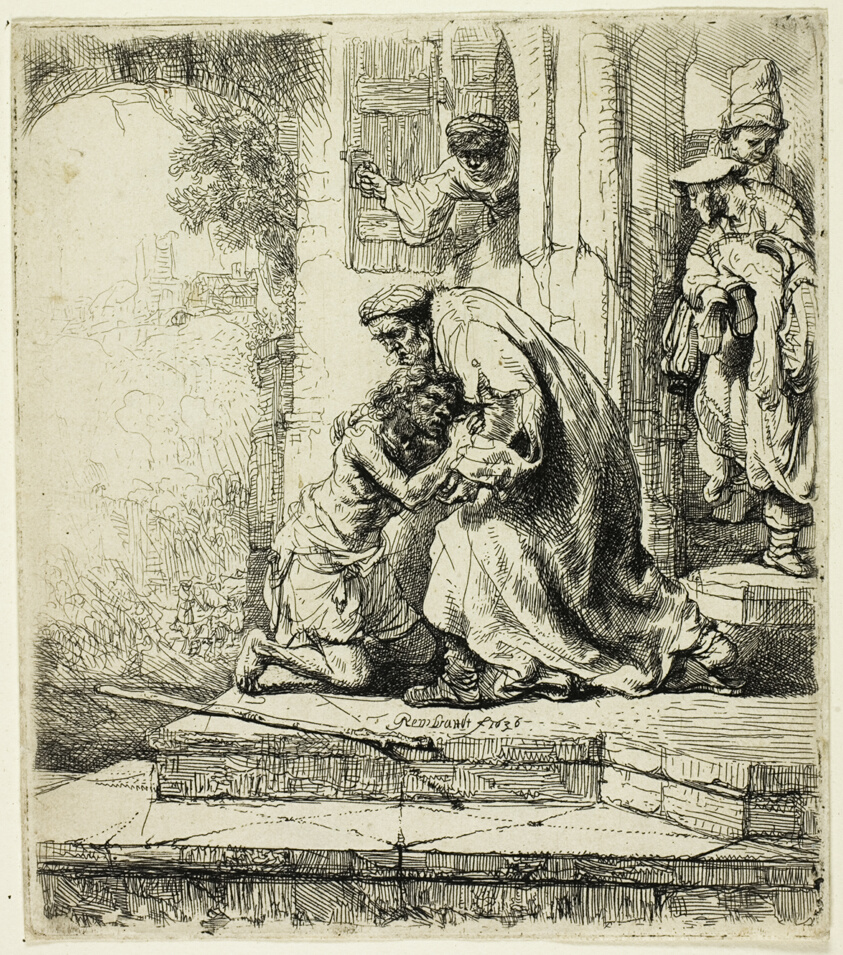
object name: Print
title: The Return of the Prodigal Son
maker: Rembrandt van Rijn (Dutch, 1606-1669)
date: 1636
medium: Etching on ivory laid paper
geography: Holland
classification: etching; print; prints and drawing; paper